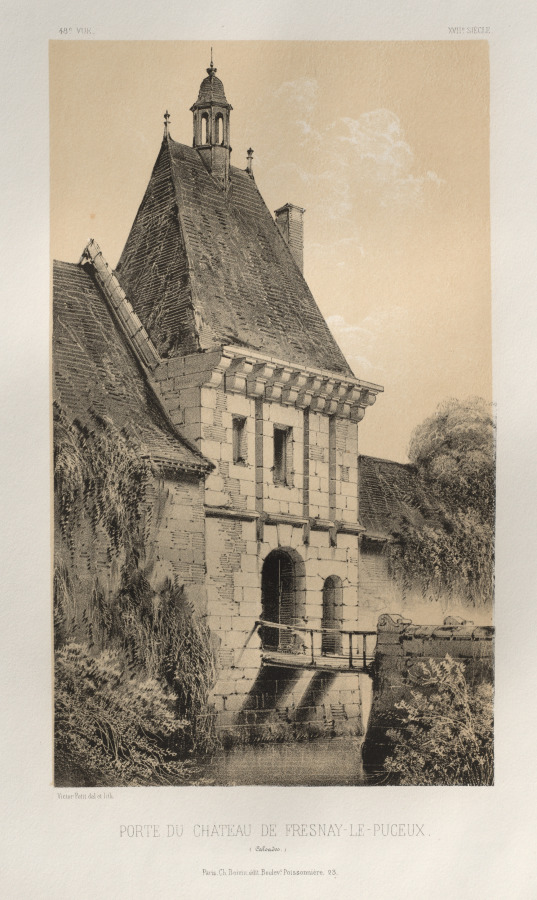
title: Architecture Pittoresque ou Monuments des XVeme. Et XVIeme. Siecles: Chateaux de France des XV et XVI Siecles: Pl. 48, Porte Du Château de Fresnay-Le-Puceux (Calvados)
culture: France, 19th century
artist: Victor Petit (French, 1817–1874)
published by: Charles Boivin (publisher and editor); Lith de Godard a Paris (printer)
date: 1860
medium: lithograph with tint stone, from portfolio of 100 lithographs with tint stone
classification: Print